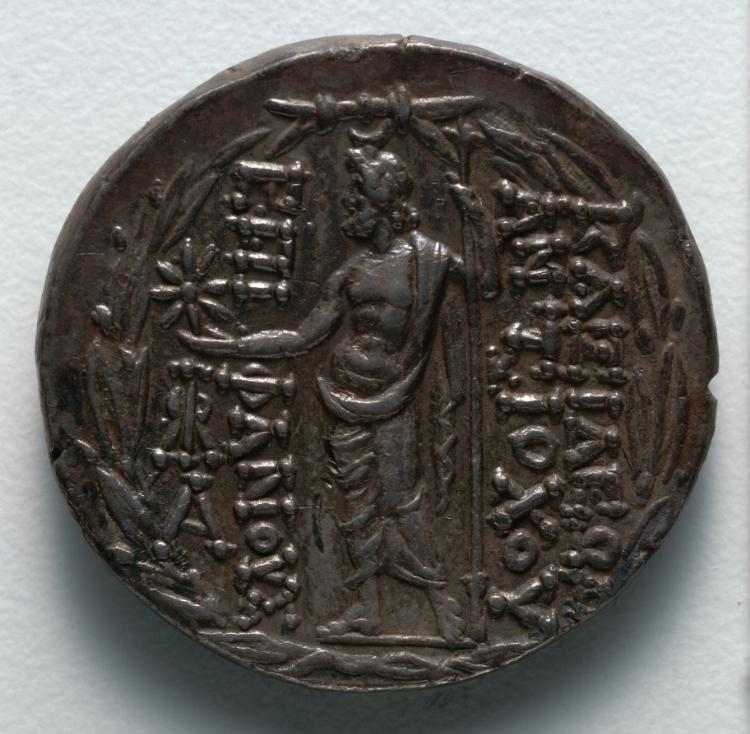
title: Tetradrachm: Zeus Ouranios within Olive Wreath (reverse)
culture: Greek, Seleukid, minted at Antioch (Syria), reign of Antiochos VIII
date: 112–110 BCE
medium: silver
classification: Coins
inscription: ΒΑΣΙΛΕΩΣ | ΑΝΤΙΟΧΟΥ | ΕΥΠΑΤΟΡΟΣ